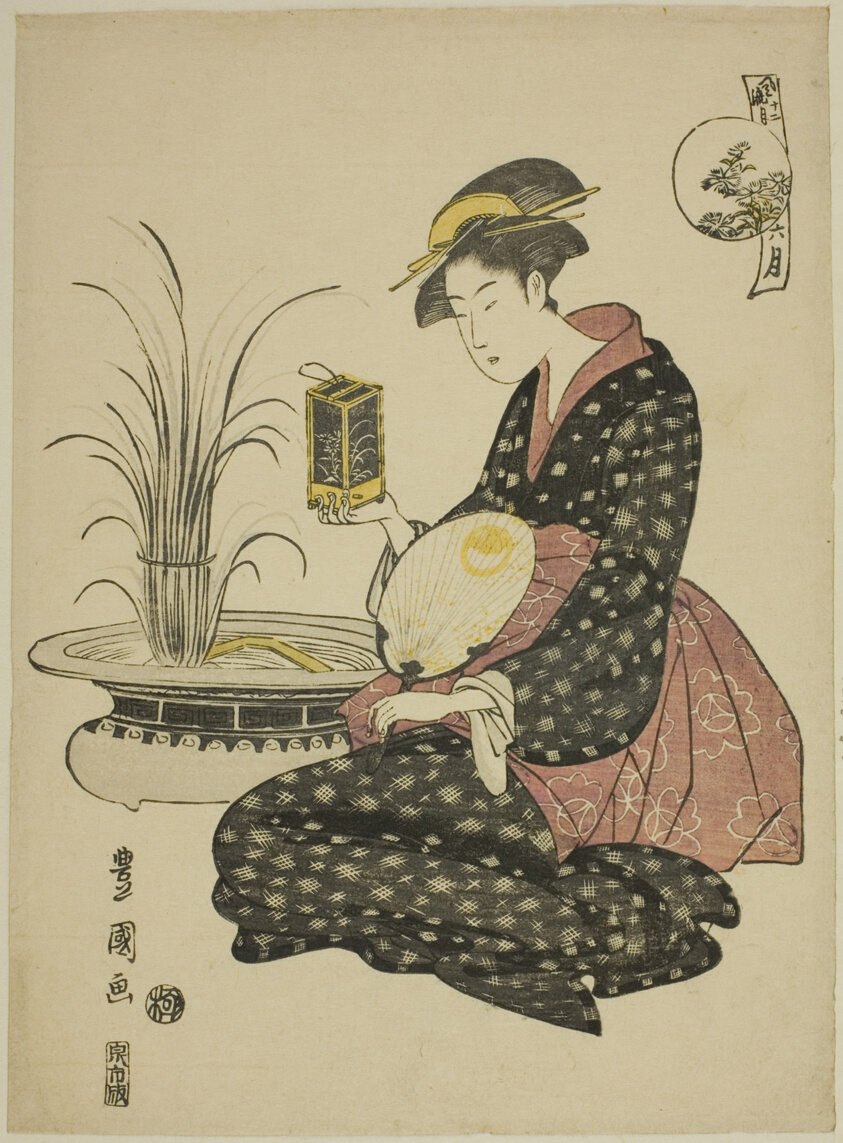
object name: Print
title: The Sixth Month (Roku gatsu), from the series "Fashionable Twelve Months (Furyu junikagetsu)"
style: Japanese (culture or style)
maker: Utagawa Toyokuni I 初代 歌川 豊国; Japanese, 1769–1825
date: c. 1793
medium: Color woodblock print; chuban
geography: Japan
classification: woodblock print; print; asian art